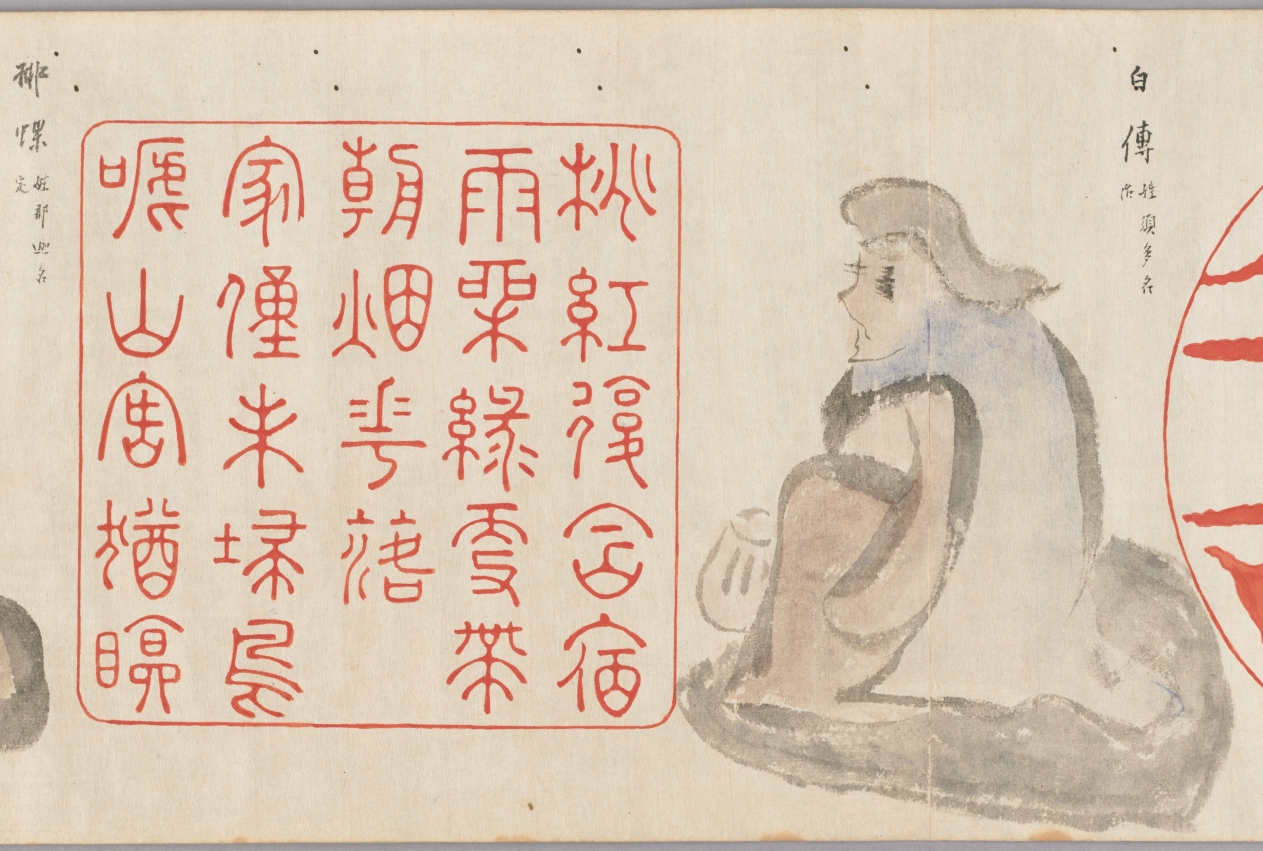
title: Chinese Seals and Poets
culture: Japan, Edo period (1615–1868)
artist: Hosokawa Rinkoku (Japanese, 1779–1843)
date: 1842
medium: handscroll; ink and color on paper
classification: Painting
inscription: Eight seal impressions are painted in red and alternate with sketchily painted figures. Artist's colophon at end of scroll.